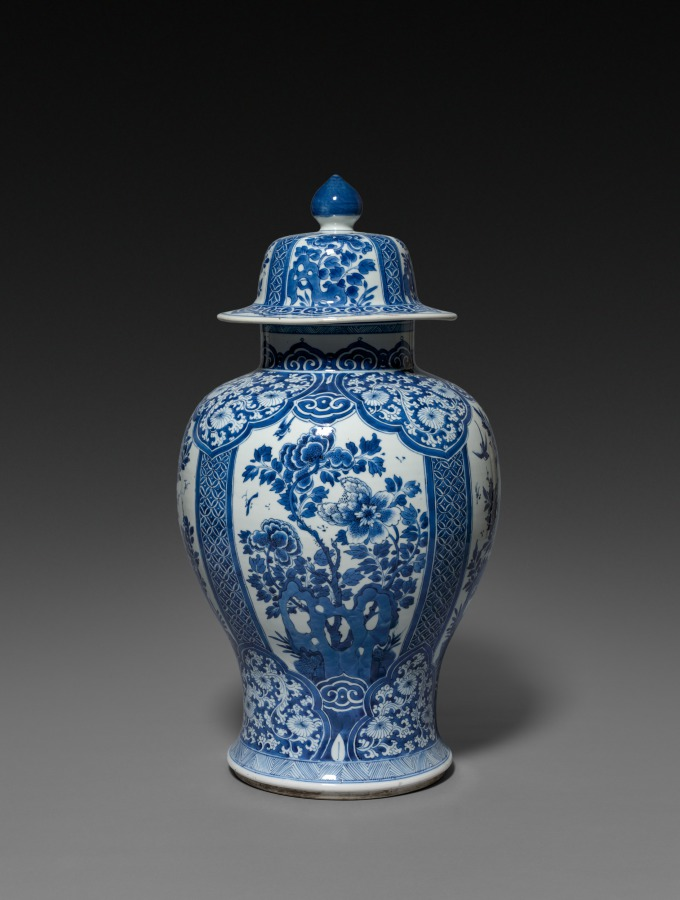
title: Vase with Cover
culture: China, Jiangxi province, Jingdezhen kilns, Qing dynasty (1644–1911), Kangxi reign (1662–1722)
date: 1662–1722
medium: porcelain with underglaze blue decoration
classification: Ceramic